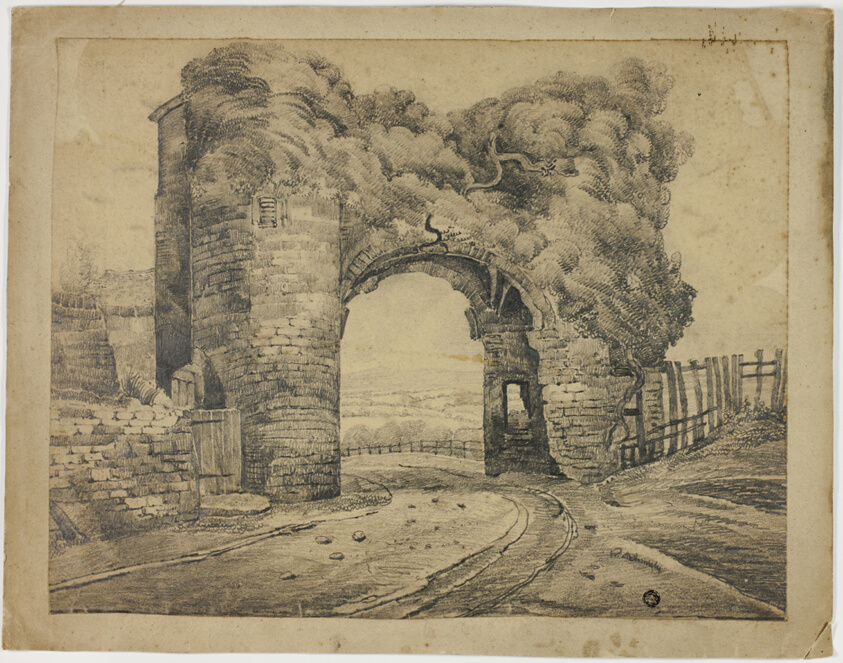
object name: Drawing and Watercolor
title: Rye Gate, Winchelsea, Kent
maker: Unknown artist (British)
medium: Graphite, on tan wove paper, laid down on tan card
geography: United Kingdom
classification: graphite; drawings (visual works); prints and drawing